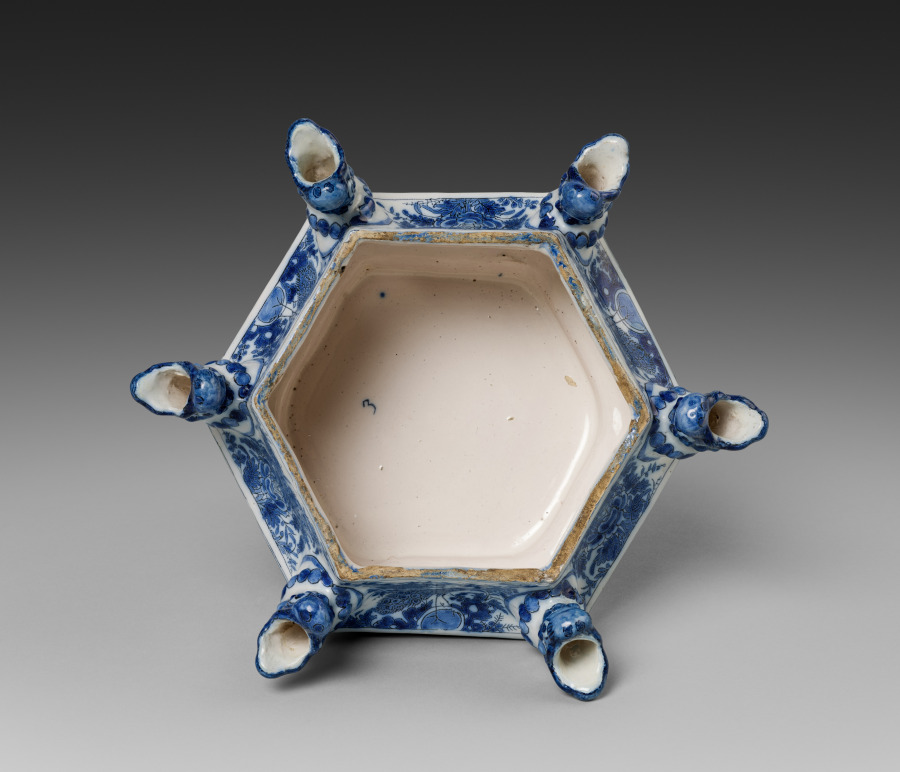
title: First Tier for a Flower Pyramid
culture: Netherlands, Holland, Delft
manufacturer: Adrianus Kocx (Dutch, active 1686–1701)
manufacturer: De Grieksche A (The Greek A) Factory (Netherlands, 1658–1811)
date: c. 1690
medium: Tin-glazed earthenware, painted in blue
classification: Ceramic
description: Allegorical figures representing Faith, Hope, and Love decorate the base of this pyramid, on which rest six tiers with spouts where flowers can be placed. Flower pyramids are among the most complex and luxurious types of ceramics produced in Delft in the late 1600s. This example was made in the Greek A Factory, owned by Adrianus Kocx. During his tenure, the factory became the most prestigious of Delft potteries and received commissions from Queen Mary II, who ruled over England, Scotland, and Ireland together with her husband, William III. She contributed to the international spread of the fashion for Delft ceramics.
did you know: The iconic blue-and-white ceramics from Delft originated as an attempt to copy Chinese porcelain.